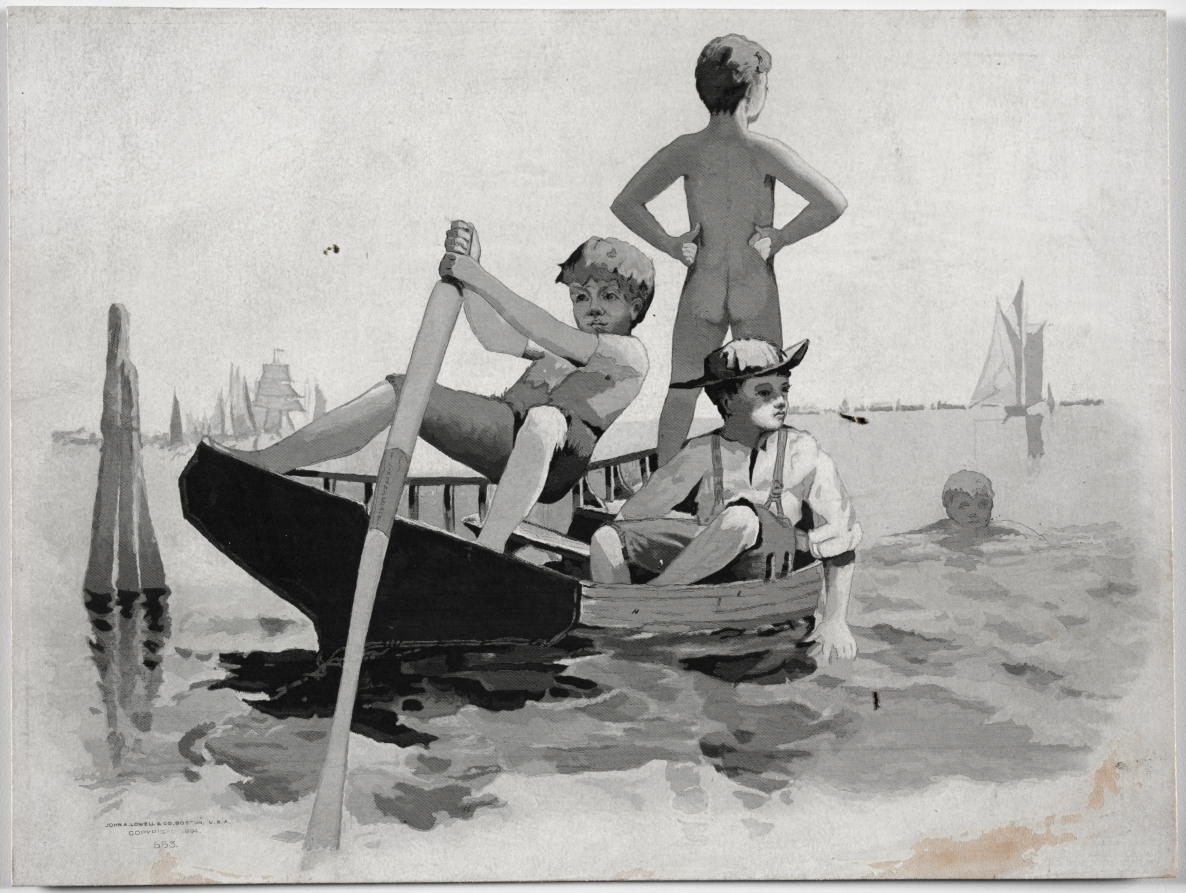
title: Boys Swimming, Gloucester Harbor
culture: America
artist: Winslow Homer (American, 1836–1910)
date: 1894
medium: line engraving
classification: Print